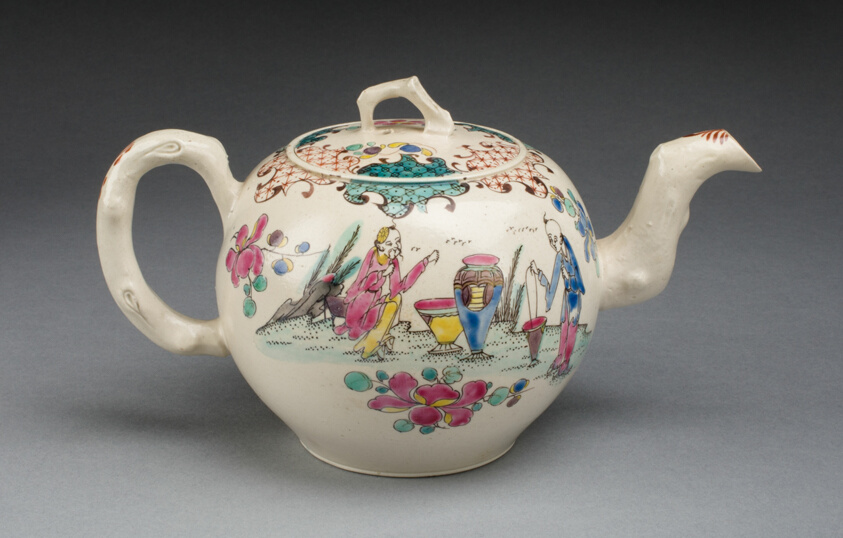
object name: Ceramics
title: Teapot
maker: Staffordshire, England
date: c. 1750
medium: Salt-glazed stoneware, polychrome enamels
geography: Staffordshire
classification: teapot; salt-glazed stoneware; european decorative arts; pottery; stoneware; ceramics